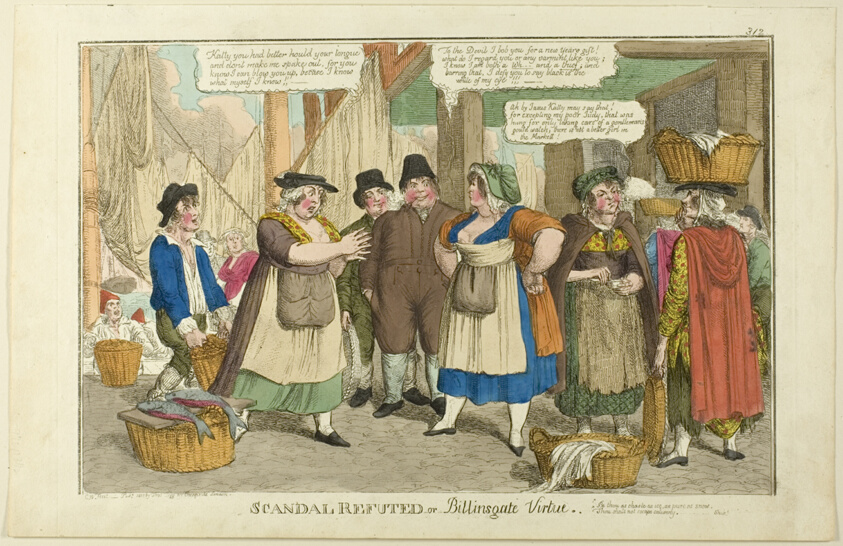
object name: Print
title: Scandal Refuted or Billingsgate Virtue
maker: Charles Williams (English, active 1797-1830); published by Thomas Tegg (English, 1776-1845)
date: 1818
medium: Etching in black, with hand-colored additions, on cream wove paper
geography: England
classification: etching; print; prints and drawing